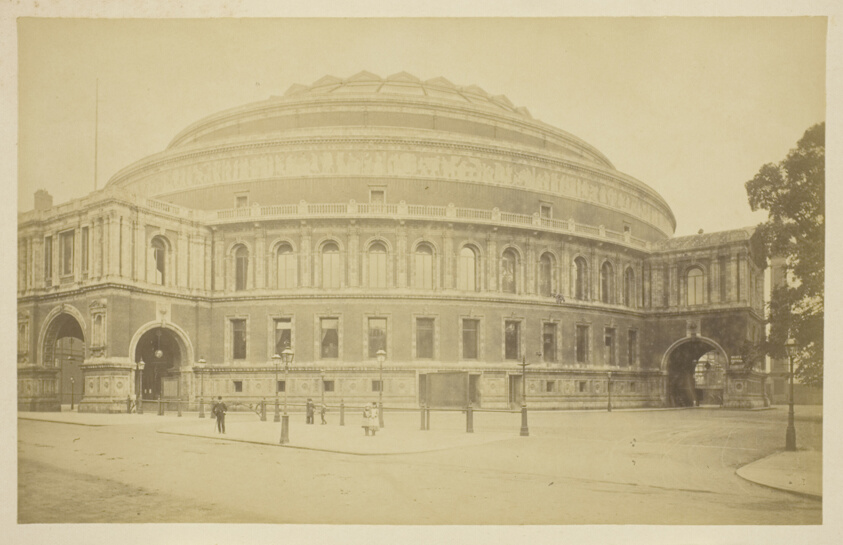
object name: Photograph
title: Royal Albert Hall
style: 19th century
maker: Artist unknown; probably English, 19th century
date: 1850–1900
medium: Albumen print, from the album "Views of London"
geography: England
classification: albumen silver print; photographic process; photography; photograph